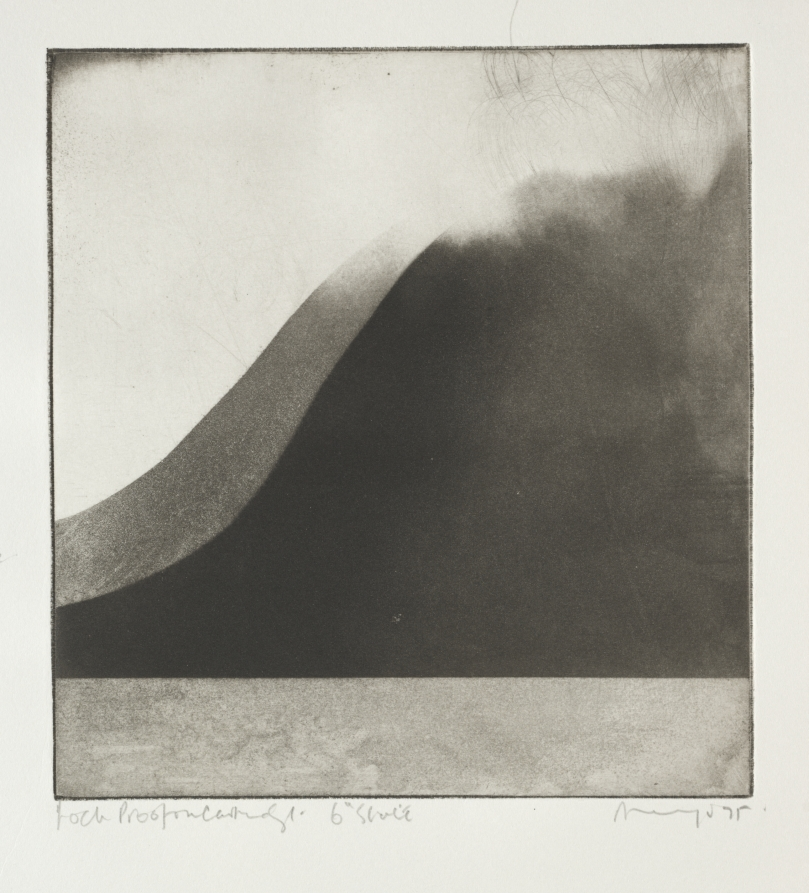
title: Canon Page from a Missal: Christ in Majesty with Evangelists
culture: France, Northeastern(?), 15th century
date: c. 1410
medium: ink, tempera, and gold on parchment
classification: Manuscript